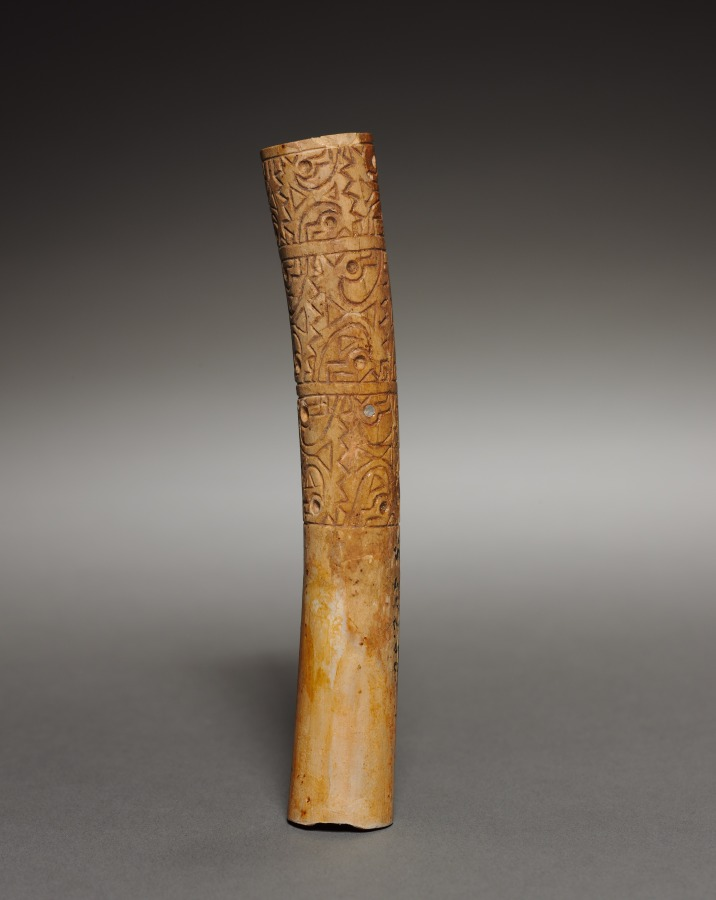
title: Pair of Ear Ornaments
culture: Peru, Moche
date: 200–550 CE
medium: incised bone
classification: Jewelry